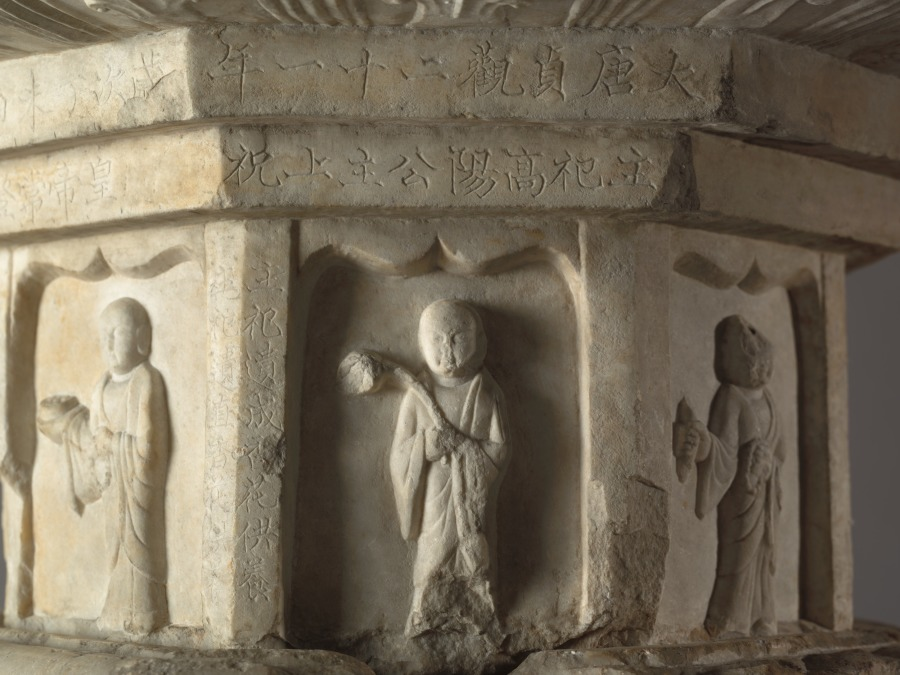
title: Fang Xuanling Pedestal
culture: China, Tang dynasty (618-907)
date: 647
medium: marble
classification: Sculpture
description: This double lotus pedestal exhibits the rich, ornate style of early Tang sculpture. It was commissioned by the Duke of Liang, Fang Xuanling (578–648), for the blessing of his second son and daughter-in-law, the Tang imperial princess of Gaoyang. The iconography and inscription suggest that it originally went with a statue, now missing, of Shakyamuni, the historical Buddha, instead of Amitayus. Today the pedestal is topped with Amitayus, the Buddha of Infinite Life, seated in meditation. Although the pedestal was not made with the statue, the combination is faithful to the original artistic conception.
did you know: In front, the top layer of the pedestal has an abstract curvilinear motif suggesting drapery; the rear is carved with a flower-and-leaf motif.